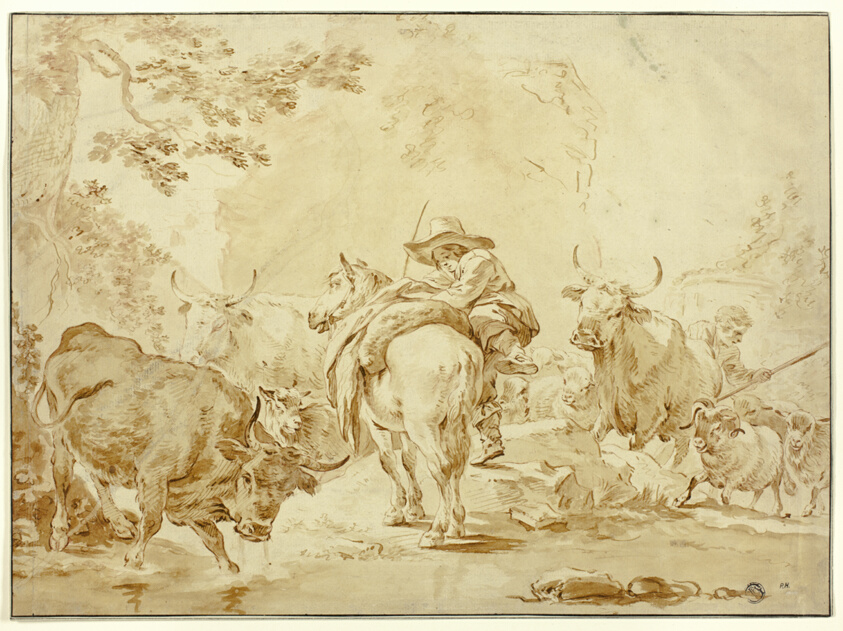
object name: Drawing and Watercolor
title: Herdsmen with Cattle and Sheep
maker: Follower of Claes Pietersz Berchem (Dutch, 1620-1683); or Pieter van Bloemen (Flemish, 1657-1720)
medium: Pen and brown ink with brush and brown wash over red chalk on ivory laid paper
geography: Holland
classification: ink or chalk wash; drawings (visual works); prints and drawing